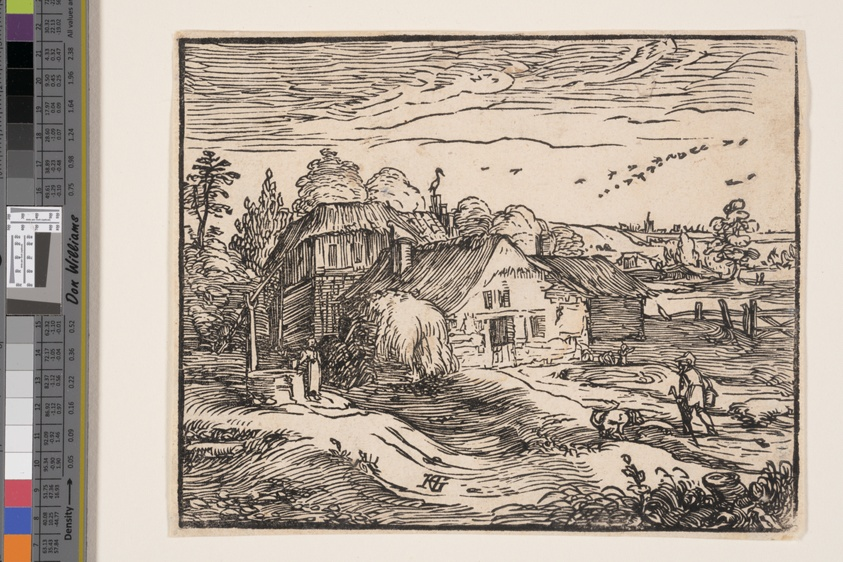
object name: Print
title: Landscape with a Farmhouse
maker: Hendrick Goltzius (Dutch, 1558–1617)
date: c. 1600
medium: Woodcut in black on cream laid paper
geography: Netherlands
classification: woodcut; paper; print; prints and drawing